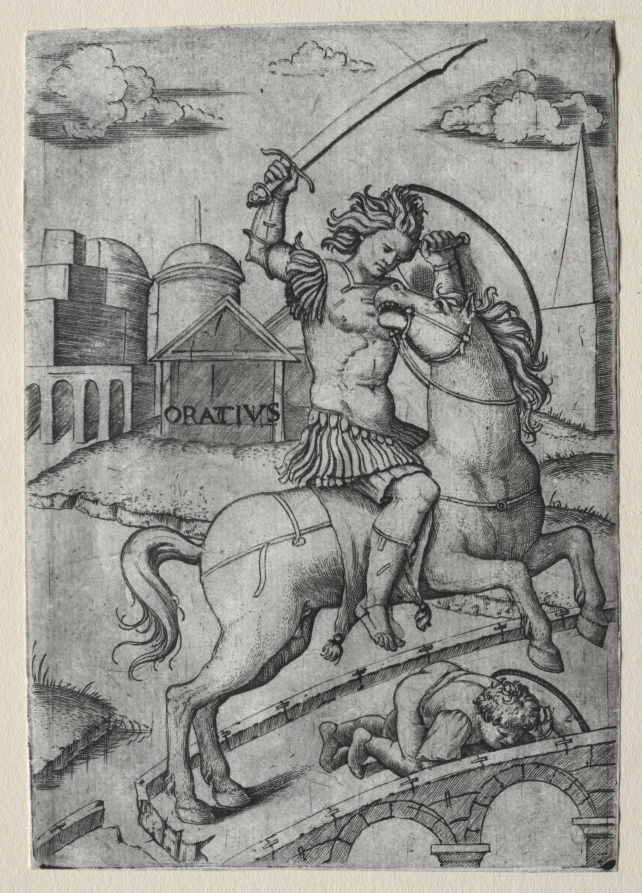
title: Horatius Cocles Defending the Sublician Bridge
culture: Italy, 16th century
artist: Marcantonio Raimondi (Italian, 1470/82–1527/34)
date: c. 1510–27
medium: engraving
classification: Print